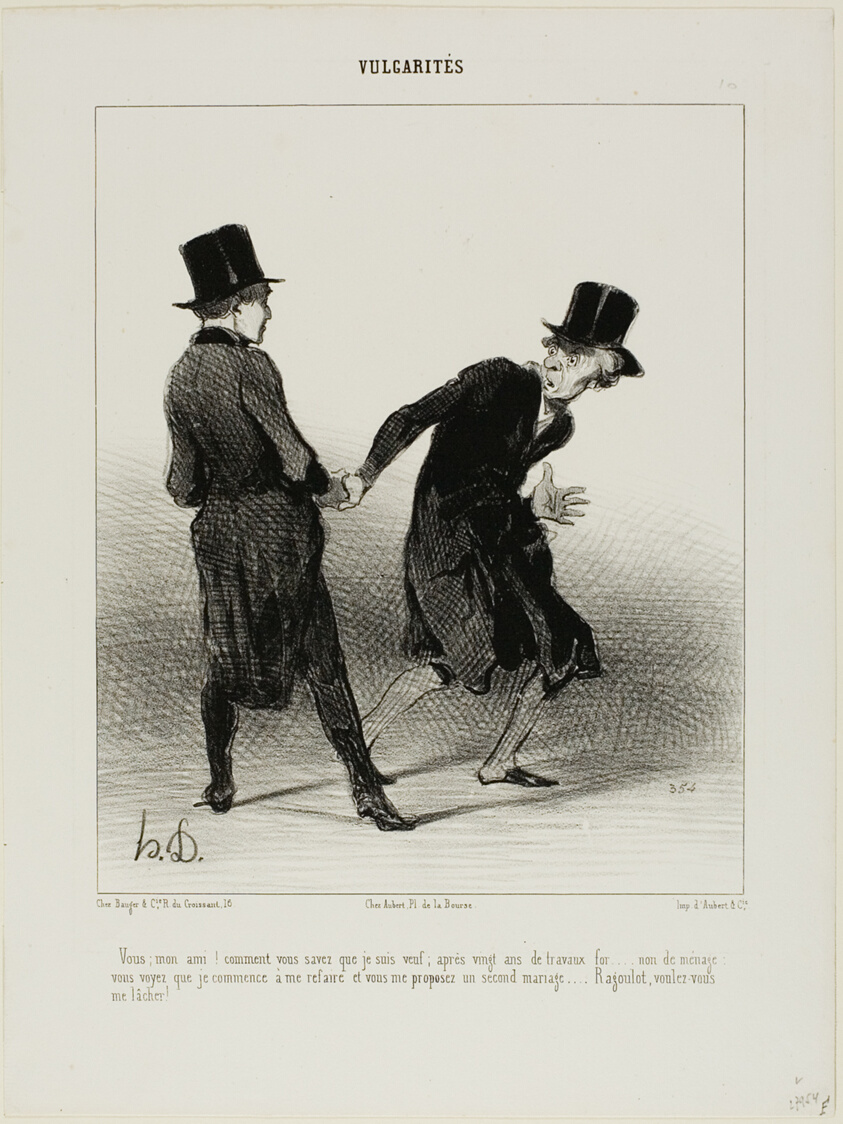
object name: Print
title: “- How do you know that I am a widower? After twenty years of forced labour, not marriage, I am slowly starting to pull myself together again, and there you are, proposing me a second marriage! Ragoulet, would you please stop holding my hand!,” plate 10 from Vulgarités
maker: Honoré Victorin Daumier; French, 1808-1879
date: 1841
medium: Lithograph in black on white wove paper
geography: France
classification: lithograph; print; prints and drawing